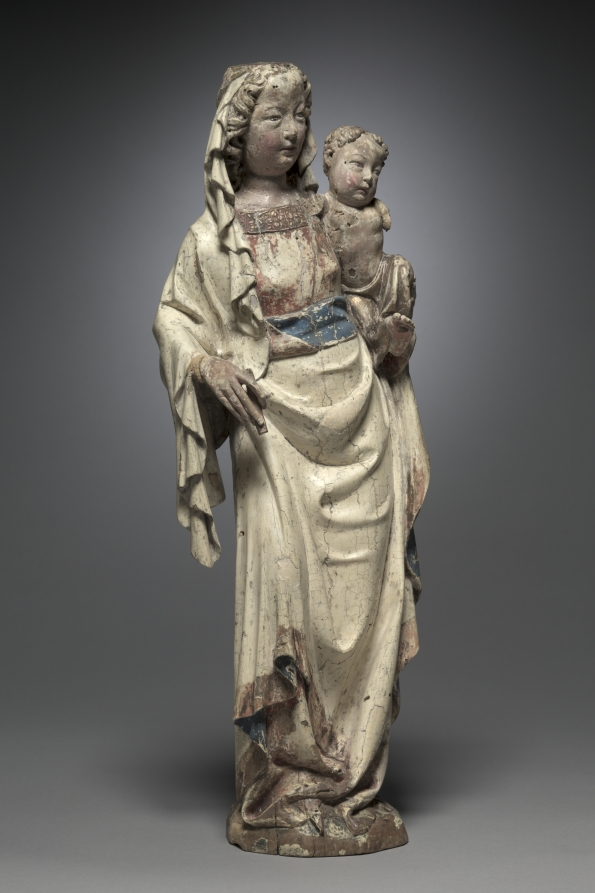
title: Virgin and Child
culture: Austria, Diocese of Passau, 14th century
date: c. 1370–1380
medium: painted lindenwood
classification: Sculpture